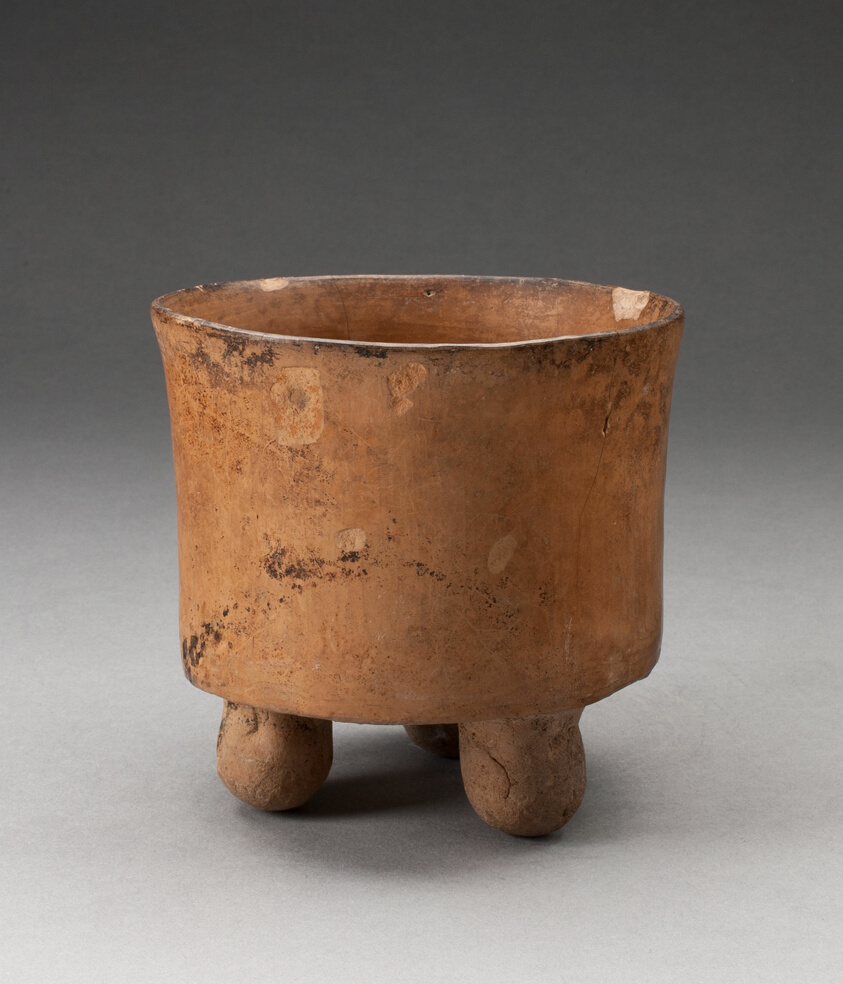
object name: Vessel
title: Tripod Vessel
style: teotihuacán, mesoamerican, Pre-Columbian, americas, Arts of the Americas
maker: Teotihuacan (Teotihuacan, Mexico)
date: 900–1100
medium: Ceramic and pigment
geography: Mexico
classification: vessel; earthenware; ceramics; art of the americas